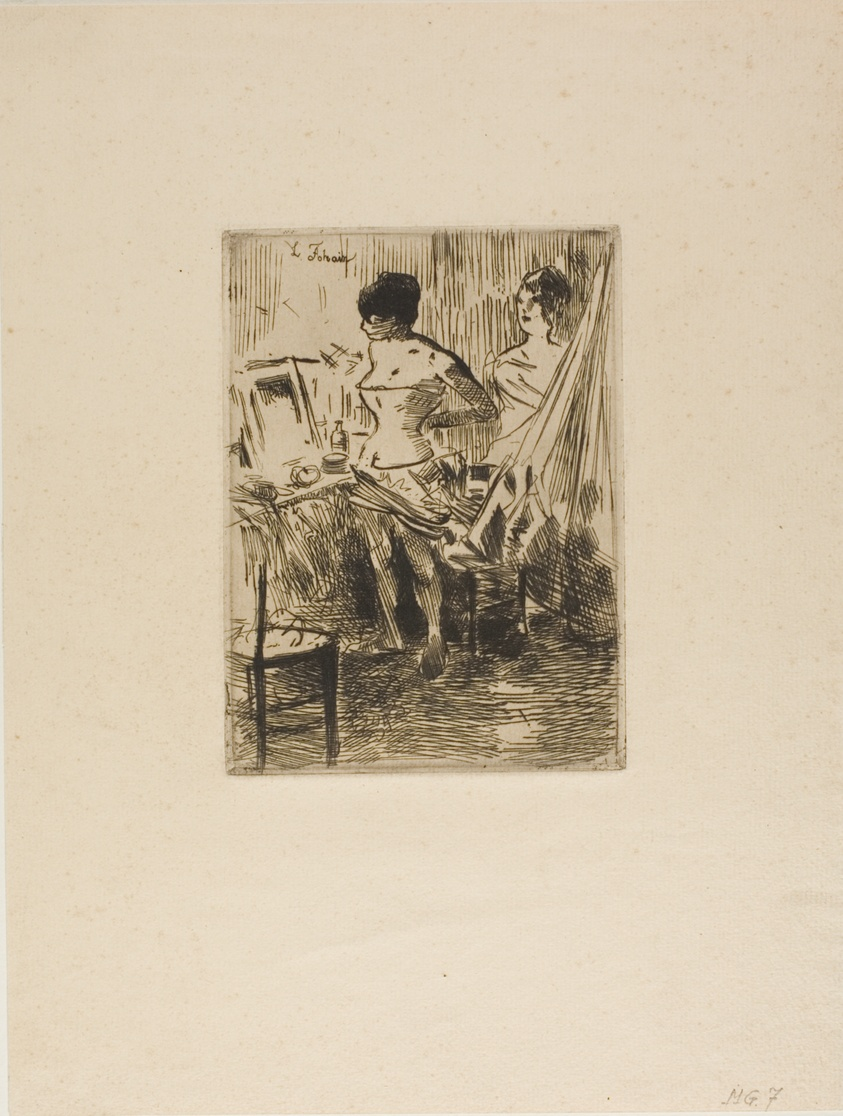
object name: Print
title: Dancers in their Dressing Room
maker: Jean Louis Forain (French, 1852-1931)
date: c. 1876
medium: Etching in black on cream laid paper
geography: France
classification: etching; print; prints and drawing